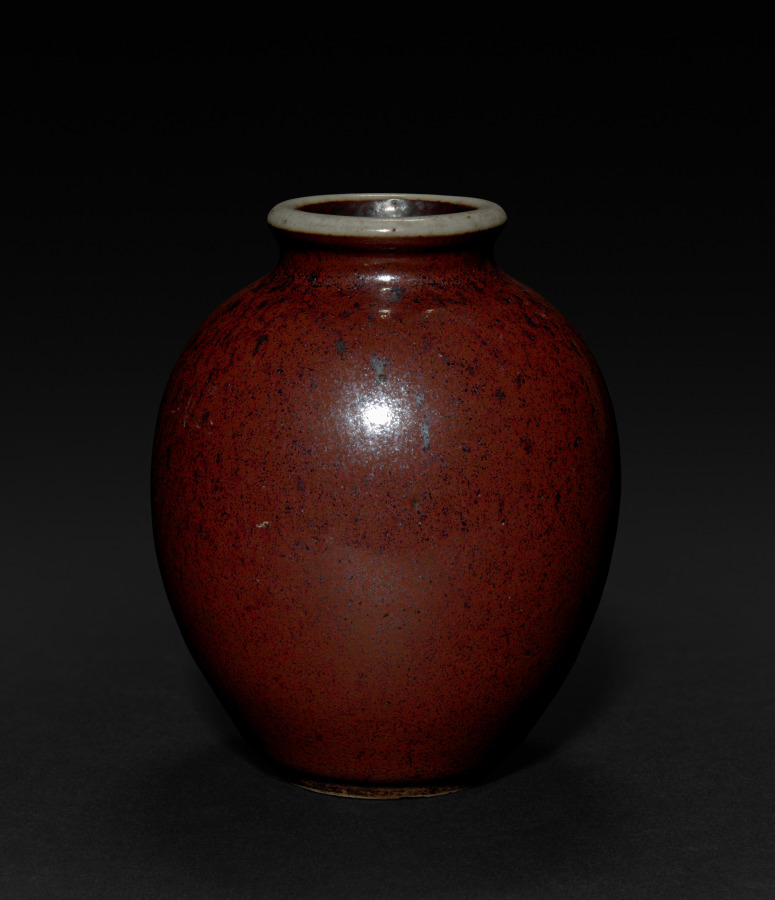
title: Jar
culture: China, Qing dynasty (1644–1911), Qianlong reign (1736–95)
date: 1736–95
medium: porcelain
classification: Ceramic